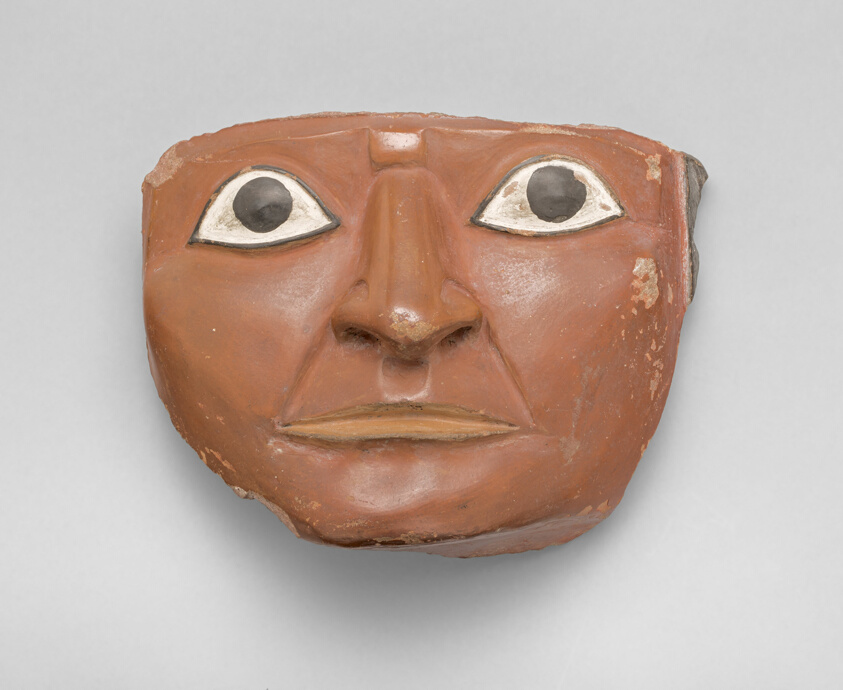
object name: Vessel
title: Head Fragment from a Large Ceremonial Jar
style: tiahuanaco, middle horizon, Pre-Columbian, americas, huari, andes, Arts of the Americas, andean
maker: Tiwanaku-Wari; Pacheco, south coast, Peru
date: 700–800 CE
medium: Ceramic and pigment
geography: Pacheco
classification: earthenware; ceramics; fragment; vessel; art of the americas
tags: people, faces